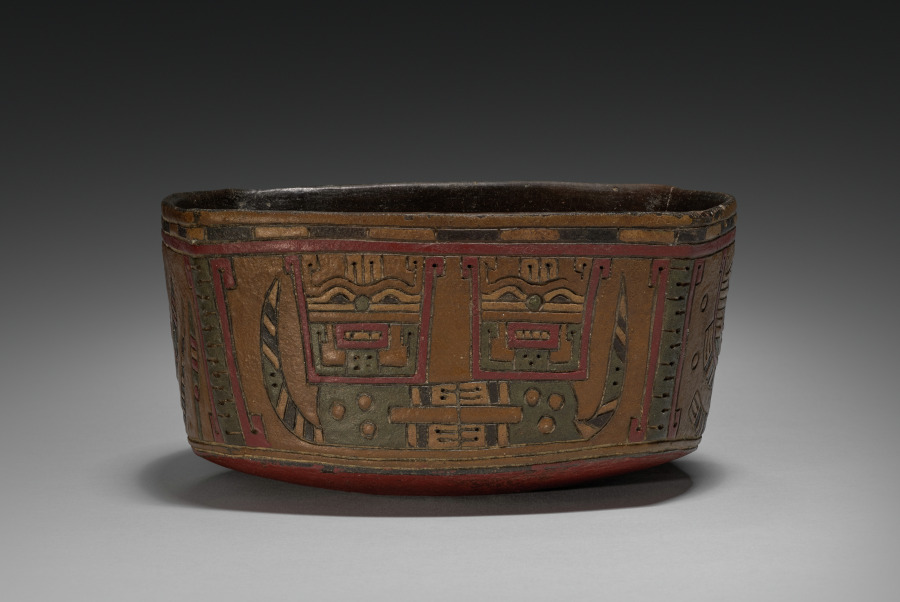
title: Square Bowl with Pampas Cats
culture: Central Andes, South Coast, Paracas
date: 500–400 BCE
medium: Ceramic, post-fire paint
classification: Ceramic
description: The Paracas often decorated their ceramics with geometricized representations of the native Pampas cat, a small, reclusive, wild feline that lives on the margins of agricultural fields, where it preys on the rodents and other pests that are a farmer’s bane. Thus, the ancients seem to have linked it to nature’s fertility and, by extension, human prosperity and continuity.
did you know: The animal shown on this bowl is the Pampas cat, a small, wild feline.